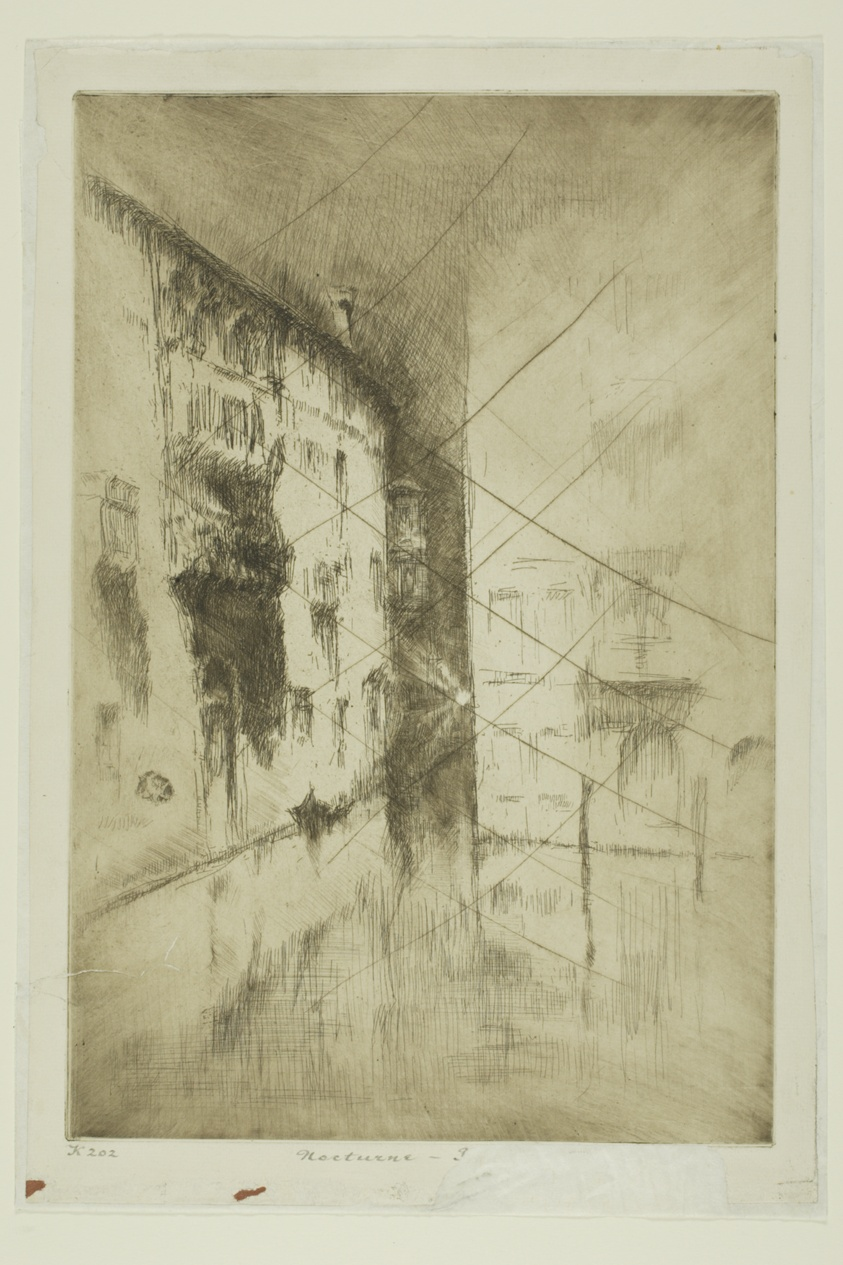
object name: Print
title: Nocturne: Palaces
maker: James McNeill Whistler (American, 1834-1903)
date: 1879/80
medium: Etching and drypoint with foul biting, with drypoint cancellation, in dark brown ink on ivory laid paper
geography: United States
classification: etching; print; prints and drawing; foul biting; drypoint; paper